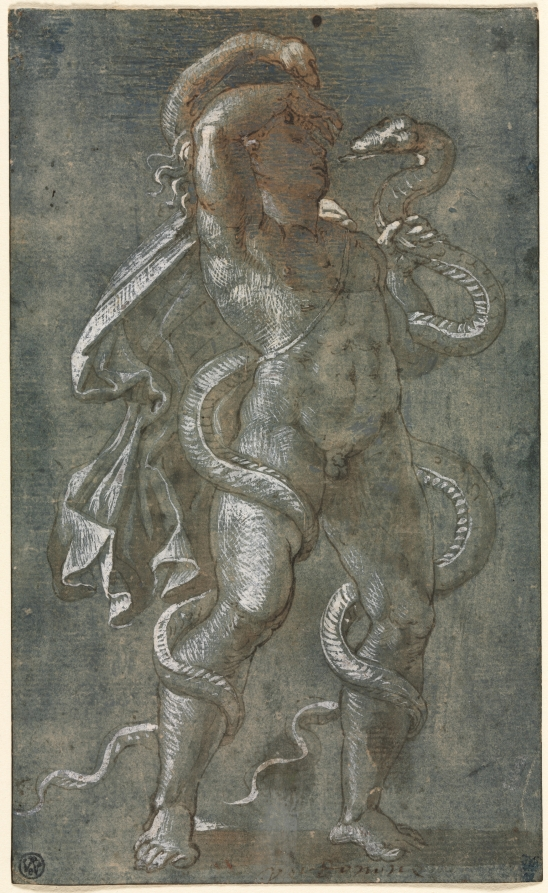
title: Man Entwined by Two Snakes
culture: Italy, 16th century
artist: attributed to Giovanni Antonio da Pordenone (Italian, 1483/84–1539)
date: c. 1527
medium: pen and brown ink and brown and blue wash, heightened with white gouache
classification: Drawing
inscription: lower center, in brown ink: Pordenone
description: According to contemporary accounts, Michelangelo attended the excavation of the Greek sculpture Laocoön and His Sons when it was unearthed near Rome in 1506. Laocoön was a Trojan priest who, along with his two sons, was attacked by sea serpents sent by the goddess Athena. The emotional agony of the sculpture fascinated Michelangelo and artists throughout Italy, inspiring copies and variations. In this drawing, a northern Italian artist referenced just one figure from the story using the chiaroscuro technique—achieved here with dark and light inks on blue toned paper—to emphasize the sculptural quality of the body.